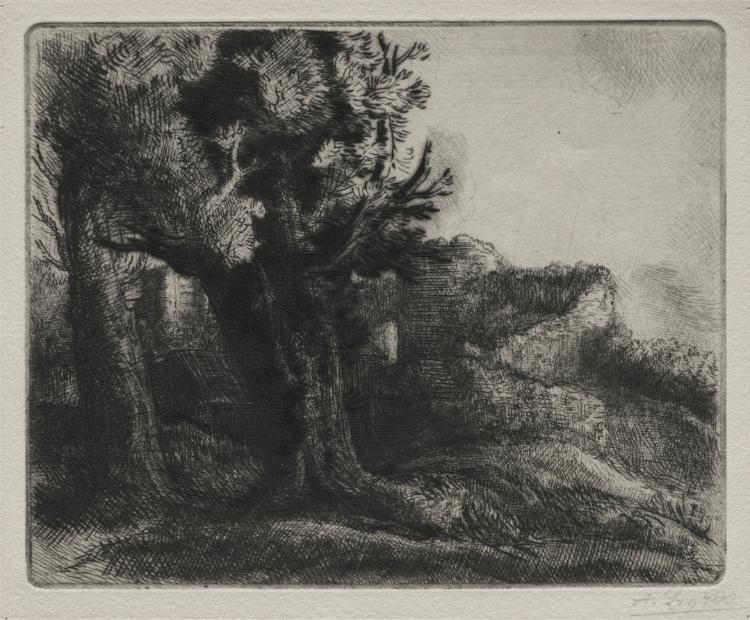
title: In the Ruins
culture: France, 19th-20th century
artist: Alphonse Legros (French, 1837–1911)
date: c. 1857–1911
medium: etching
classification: Print